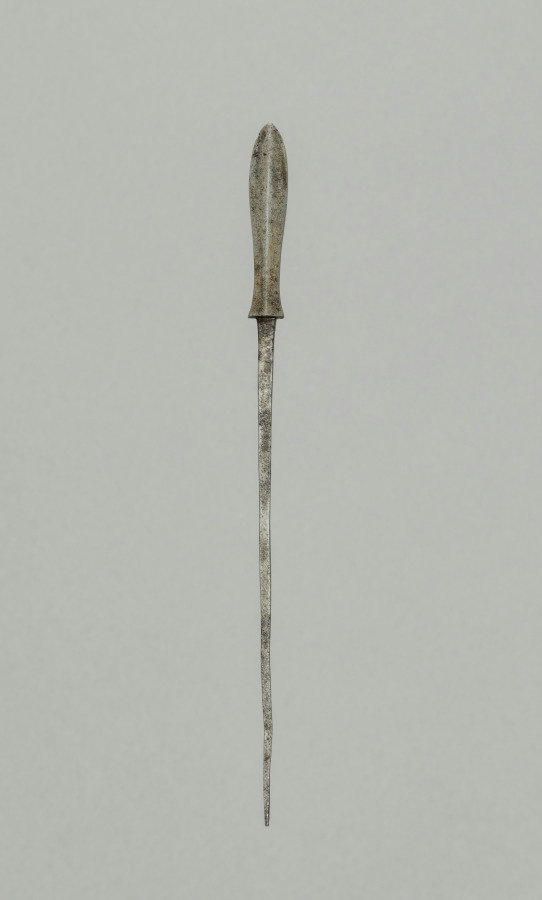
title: Arrow Point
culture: Japan, Edo period (1615–1868)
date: 1700s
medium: steel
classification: Arms and Armor